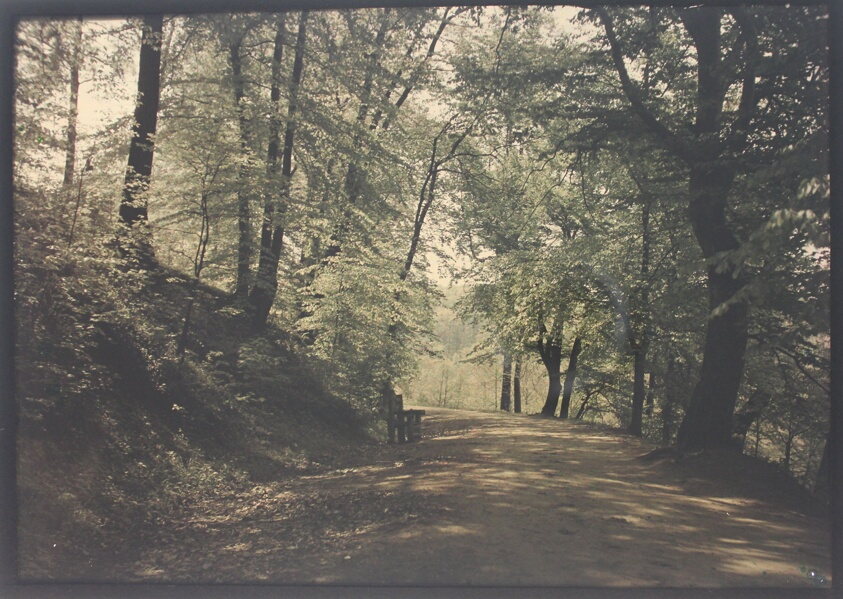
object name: Photograph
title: Untitled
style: 19th century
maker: Artist unknown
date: c. 1880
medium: Autochrome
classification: photograph; photography